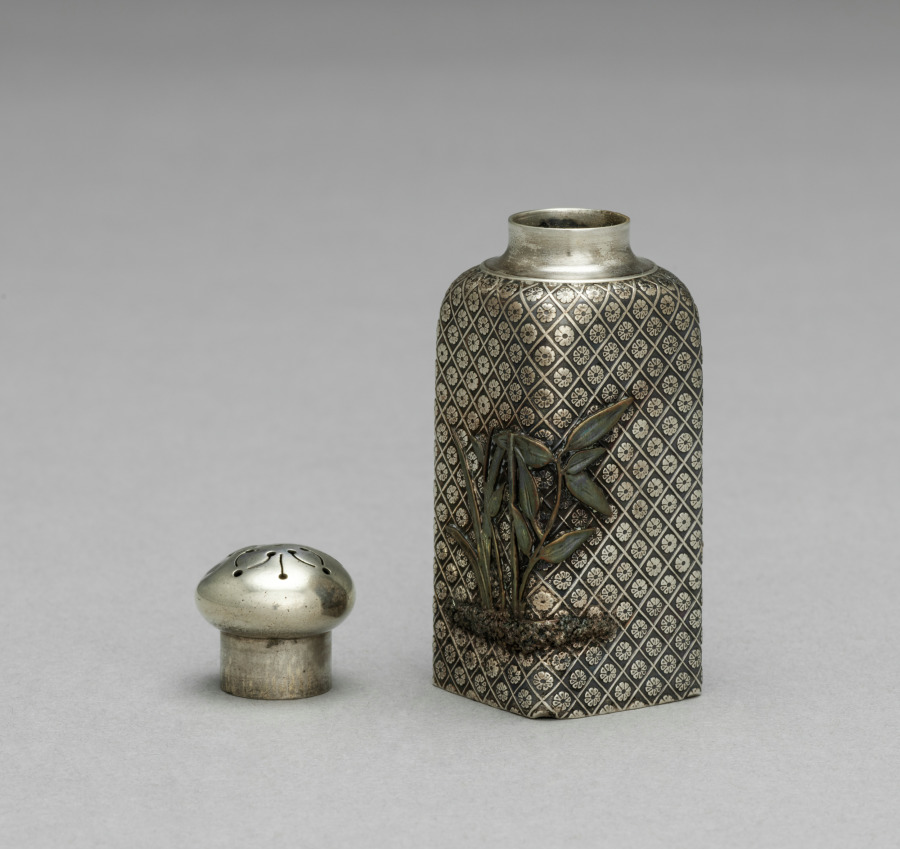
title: Salt Shaker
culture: America, Rhode Island, Providence, 19th century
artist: Gorham Manufacturing Company (America, est. 1831)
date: c.1875–1885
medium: silver and mixed metals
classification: Silver